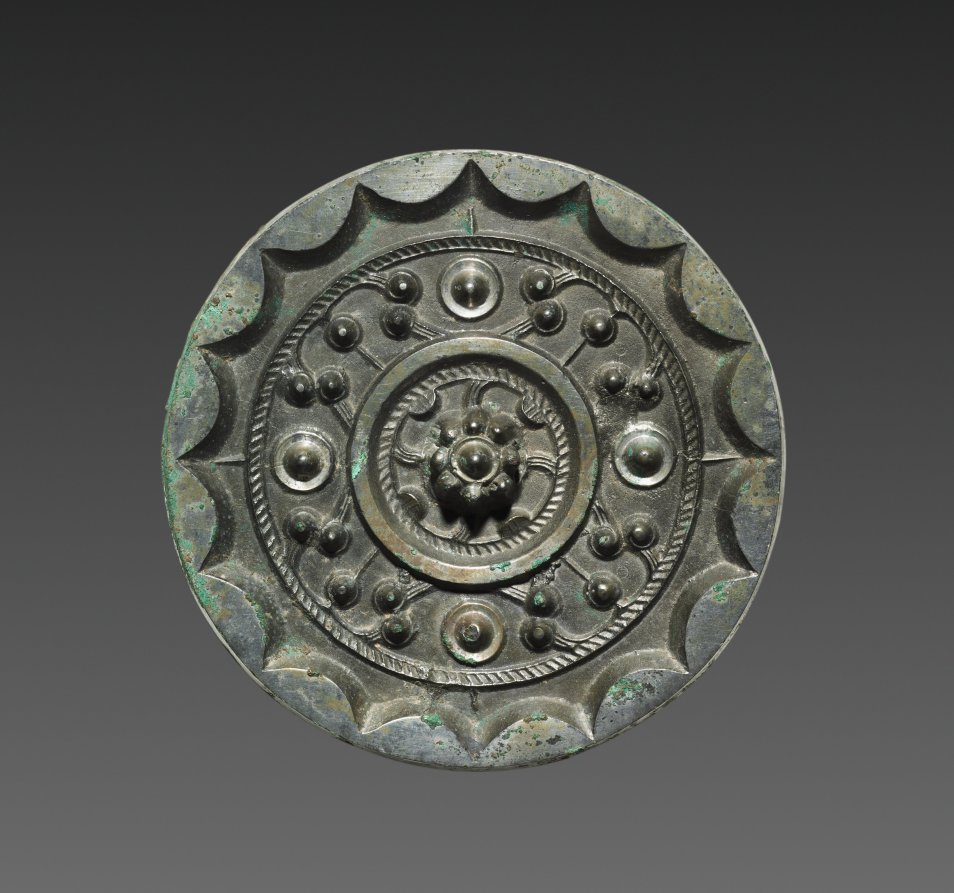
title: Mirror with Clouds and Nebulae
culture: China, Western Han dynasty (206 BCE–8 CE)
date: 200–100 BCE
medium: bronze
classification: Metalwork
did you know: Mirrors provided literal reflection and were decorated with symbolic imagery that illuminated universal themes.